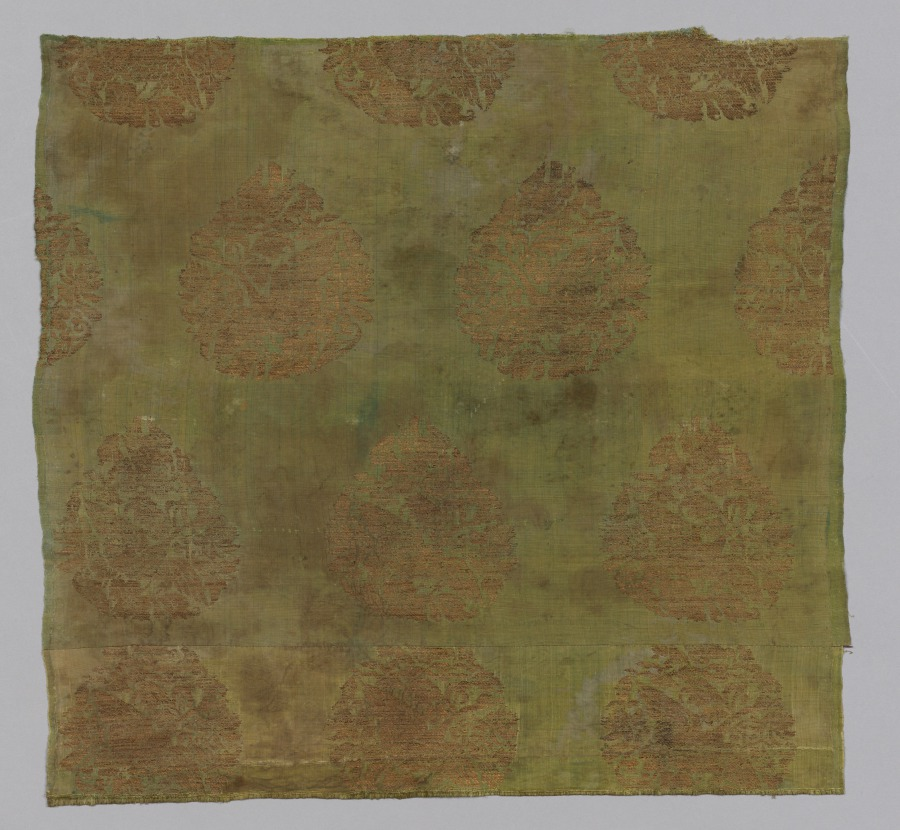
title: Brocade with Swan Hunt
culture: China, Jin dynasty (1115-1234)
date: 1115–1234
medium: tabby, brocaded; silk and gold thread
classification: Textile